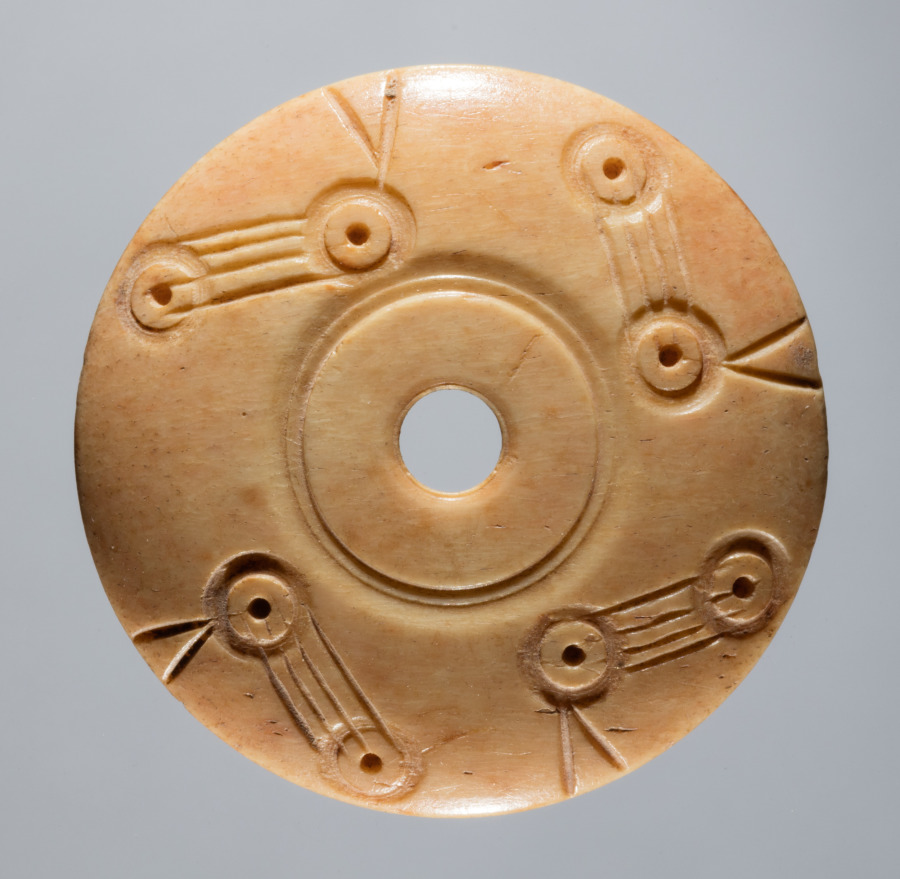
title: Spindle Whorl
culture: Iran, early Islamic period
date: 700s - 900s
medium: bone, incised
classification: Spindle Whorl